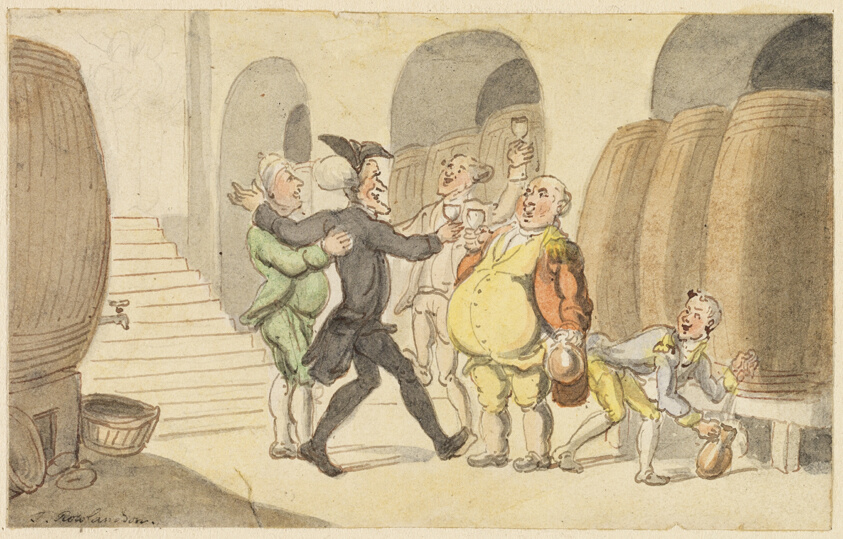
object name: Drawing and Watercolor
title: Study for Dr. Syntax made Free of the Cellar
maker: Thomas Rowlandson (English, 1756-1827)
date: c. 1812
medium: Pen and brown ink with brush and watercolor, over graphite, on ivory wove paper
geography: England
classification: watercolor; drawings (visual works); prints and drawing